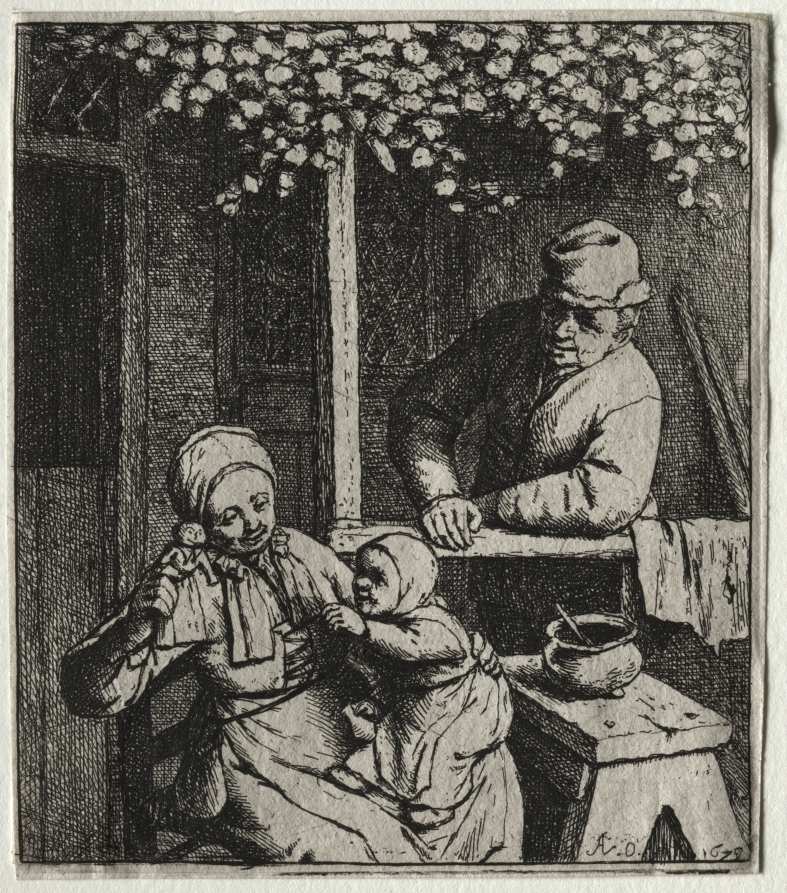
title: Asking for the Doll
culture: Netherlands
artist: Adriaen van Ostade (Dutch, 1610–1684)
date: 1678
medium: etching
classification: Print